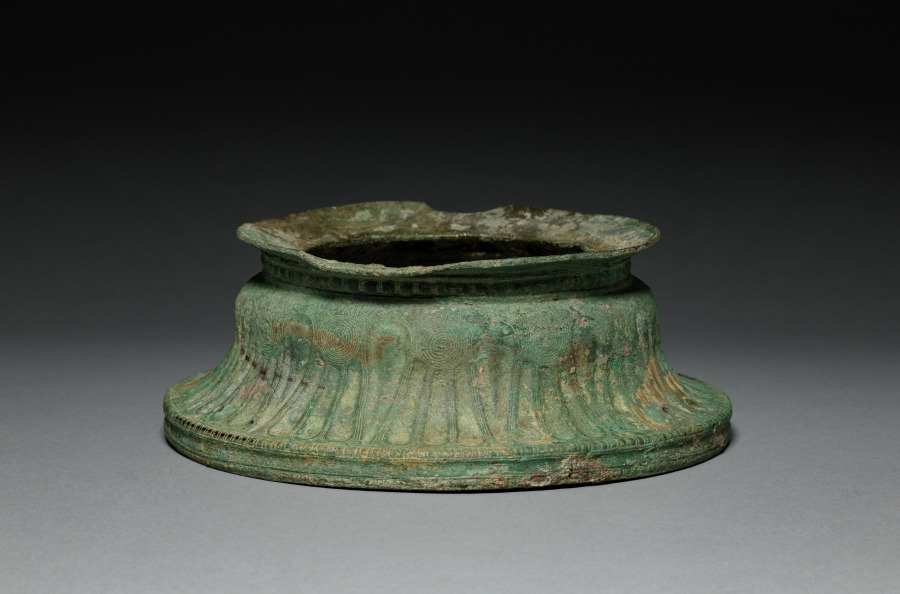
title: Bronze Volute Krater Base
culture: Greece, Laconia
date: late 600s BCE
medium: bronze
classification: Metalwork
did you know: This object supported a large vessel used for mixing wine with water called a krater.